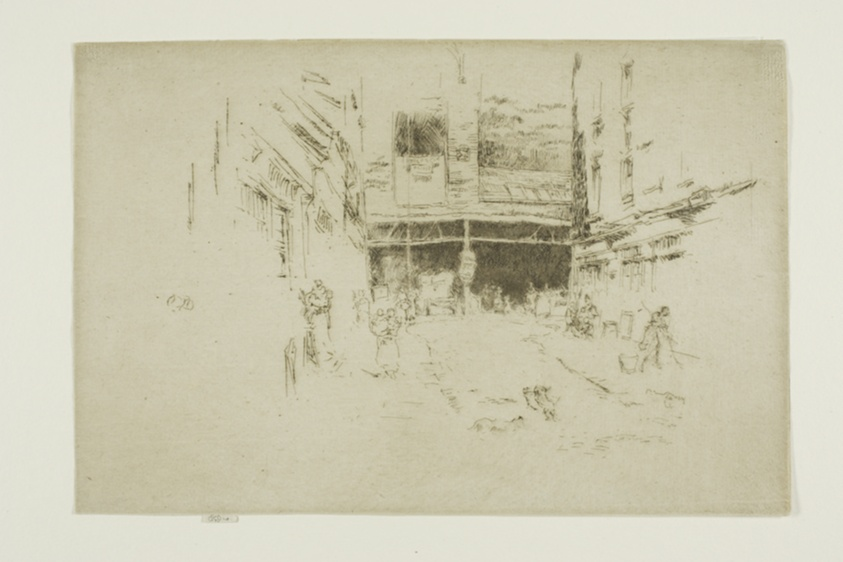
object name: Print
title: Clothes-Exchange, Houndsditch, No. 1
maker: James McNeill Whistler (American, 1834-1903)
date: 1887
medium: Etching and drypoint with foul biting in dark brown ink on buff laid paper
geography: United States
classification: etching; foul biting; print; prints and drawing; drypoint; paper